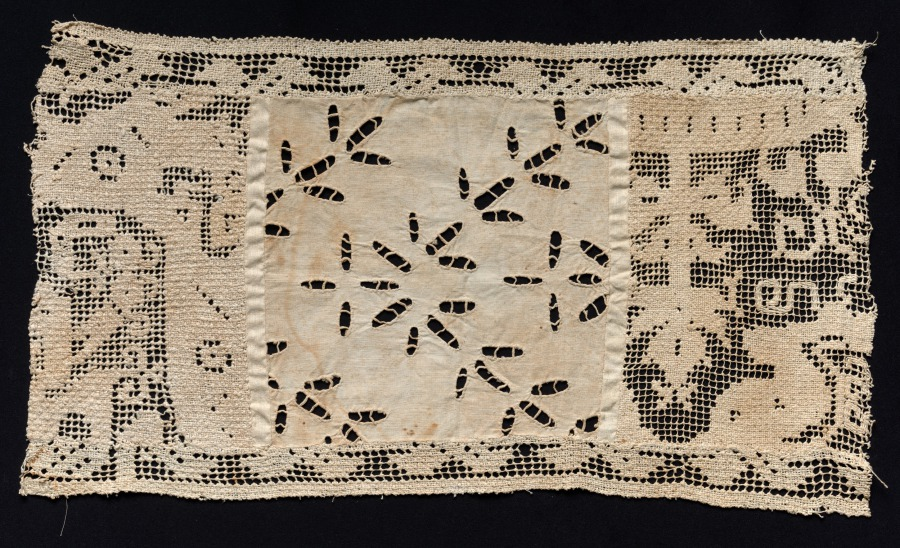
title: Fragment of Band with Vegetal Motifs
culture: Spain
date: 1600s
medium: Bleached linen (est.): needle lace, filet/lacis (knotted ground and darned in two directions) and cutwork insertion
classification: Lace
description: Textiles often incorporate multiple needlework techniques within a single piece. The insert in the center of this piece of lace is made using the cutwork technique. In cutwork, portions of the textile ground, such as a linen or cotton cloth, are cut away and threads are removed to create holes. The edges of the hole are then reinforced with embroidery and a pattern of needle lace can be created within the perimeter. Rather than adding to the cloth to create a design, the craftsperson removes threads to fabricate a pattern. The cutwork may have been inserted to replace a damaged area.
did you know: Myrta Leonora Jones, the donor of this lace, was a women’s rights activist in Cleveland in the early 20th century.